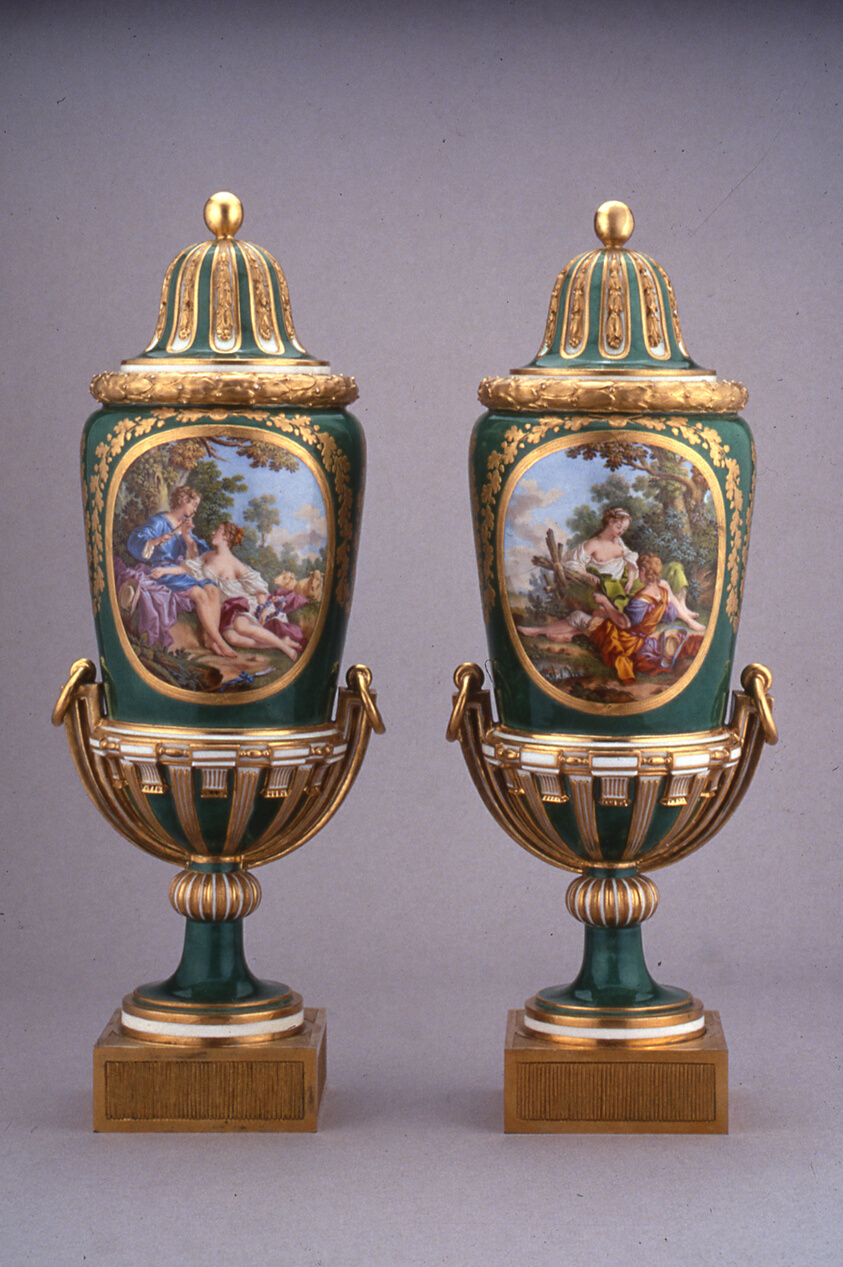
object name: Ceramics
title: Pair of Vases (Vases à Pied de Globe)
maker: Sèvres Porcelain Manufactory (French, founded 1740); Designed by Charles Nicolas Dodin (French, 1734–1803)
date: 1769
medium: Soft-paste porcelain, polychrome enamels, gilding, and gilt-bronze mounts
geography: Sèvres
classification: vase; vessel; porcelain; ceramics; european decorative arts